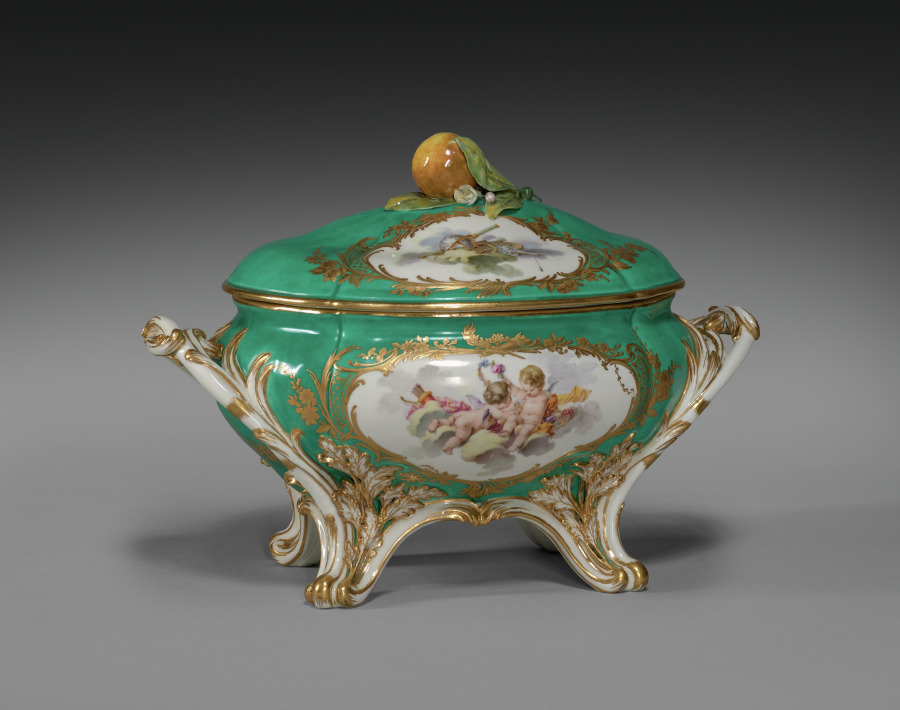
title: Covered Tureen (Terrine du roi)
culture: France, Sèvres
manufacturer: Sèvres Porcelain Factory (French, est. 1756)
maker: attributed to Charles Nicolas Dodin (French, 1734–1803)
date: 1756–57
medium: soft-paste porcelain with enamel and gilt decoration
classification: Ceramic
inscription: [Interlaced L's]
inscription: [Date letter 'D' (in cursive with a dot on either side)]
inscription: [Incised 'b']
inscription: [Incised '6']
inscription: [Inventory numbers in red enamel]: "r.u./710" [base of tureen]; "r.u./710a" [on lid]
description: This tureen’s striking green background, or fond vert, was a major advancement for the Sèvres Porcelain Factory, known for their innovation in and mastery of color. Traditionally the largest, most expensive item in an 18th-century French dinner service, this tureen was part of a porcelain dining set presented to King Frederick V of Denmark by French King Louis XV in 1758.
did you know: French King Louis XV was a great patron of the decorative arts; he acquired the Sèvres Porcelain Factory in 1759.